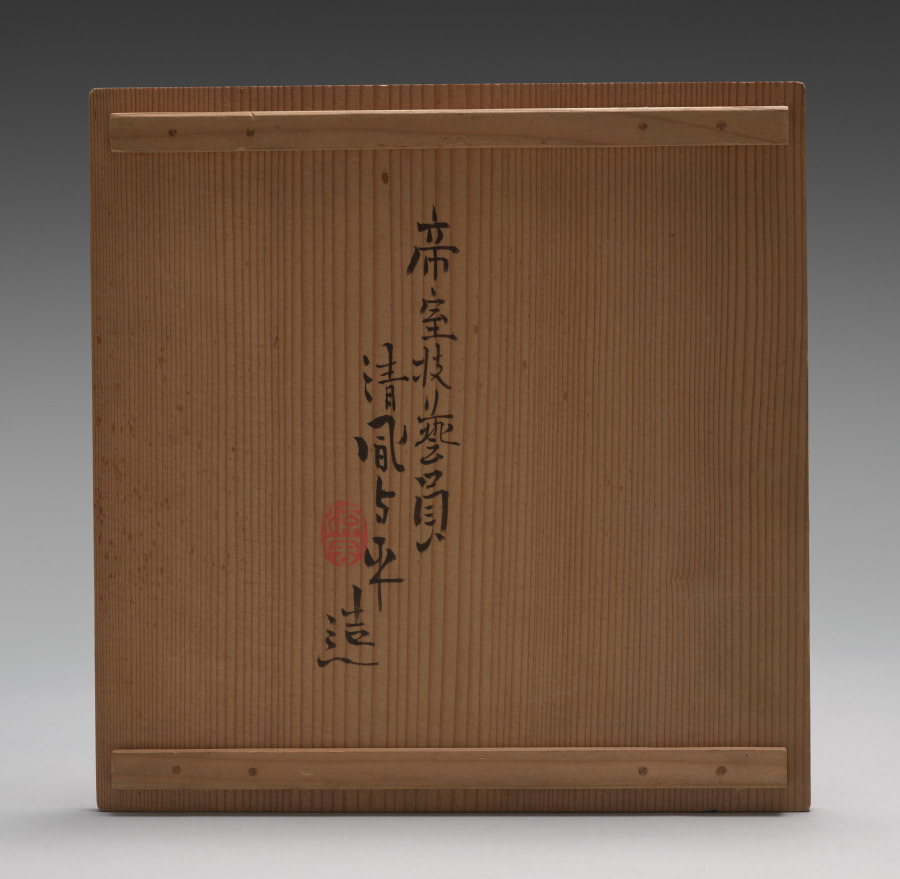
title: Dining Bowl with Clematis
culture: Japan, Meiji period (1868–1912)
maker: Seifū Yohei III (Japanese, 1851–1914)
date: 1893–97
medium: Porcelain with underglaze and overglaze colors, molded and incised designs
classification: Ceramic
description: The bowl is an especially well-executed example of Yohei III’s work in underglaze blue combined with other underglaze colors. This low-profile dining bowl has paintings of flowering clematis vines under the glaze in blue and red. Water is depicted with blue in the bottom of the bowl. The lines of white used to show motion on the water’s surface were created using either a reserve technique, where blue was omitted, or a masking technique, where parts of the surface were covered before applying the blue. A pair of butterflies flutters across one side. The foot is decorated with a pattern of spirals in blue, and the lip curves in slightly. The overall effect is one of seeing the flowering vine hanging down, hovering just above the surface of a pond, whose slight disturbances hint at unseen fish swimming below.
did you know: This bowl shows an environment painted in the round.